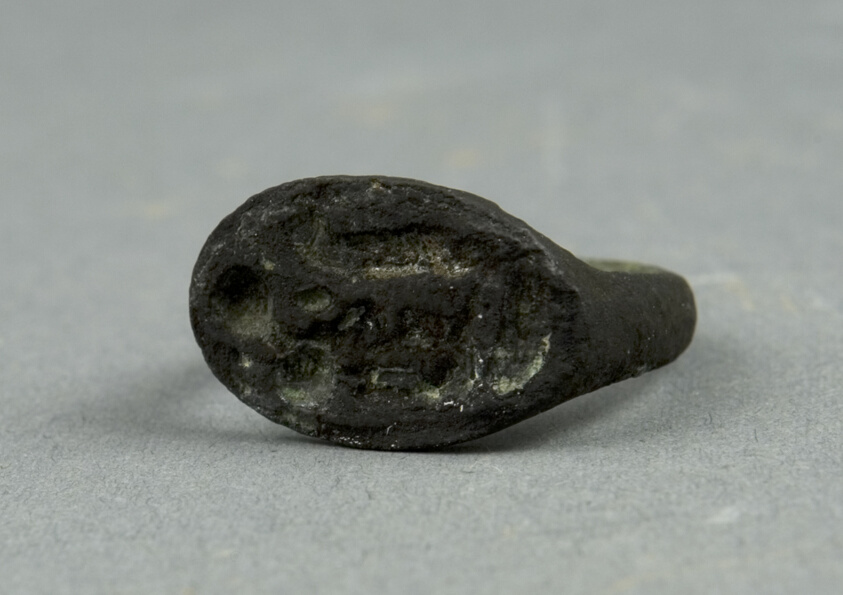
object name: Costume and Accessories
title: Ring: Nebmaatre is the Lord (Amenhotep III)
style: egyptian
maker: Egyptian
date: New Kingdom, Dynasty 18, reign of Amenhotep III (about 1390–1352 BCE)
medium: Bronze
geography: Egypt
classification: bronze; metal; jewelry; ancient art; costume